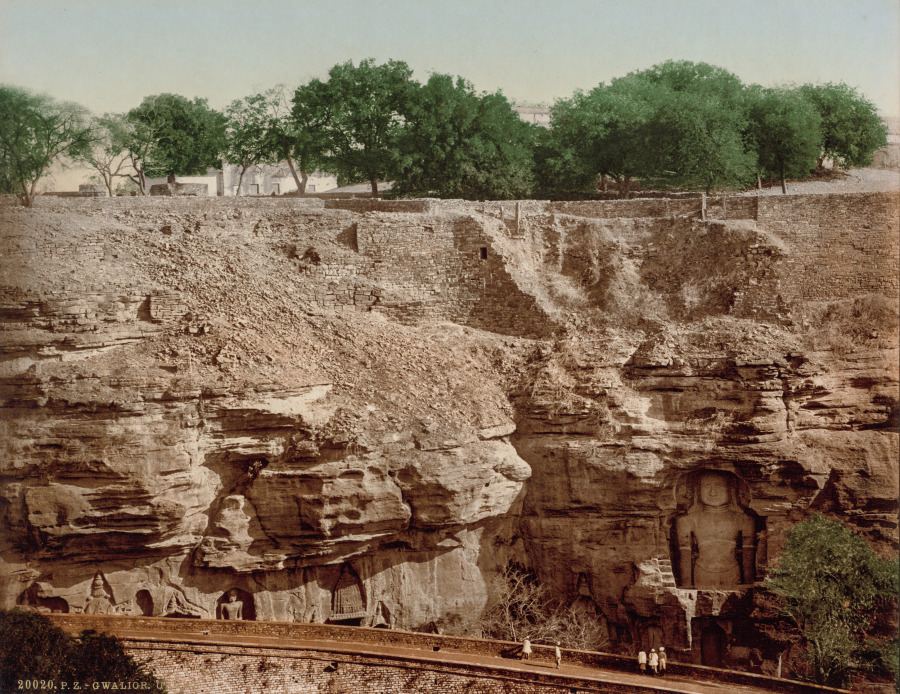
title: Gwalior. Urwai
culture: India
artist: Photoglob Co. (Zurich, active c. 1890–1910)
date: 1890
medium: Photochrom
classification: Photograph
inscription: Imprinted in gold on recto in lower left corner: “20020. P.Z.-GWALIOR. URWAI”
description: The sculptures were carved into the steep sides of the cliffs below Gwalior’s fort in the mid-1400s, but the faces were re-cut after the images were defaced in 1527. The tiny visitors depicted on the road emphasize their monumental scale. The colors in this image are imagined, added later in the studio in a lithographic printing process that produces colorized ink-on-paper prints from black-and-white photographic negatives.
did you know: These sculptures depict Jinas, who are venerated by followers of the Jain religion of India, one of the oldest religions in the world.